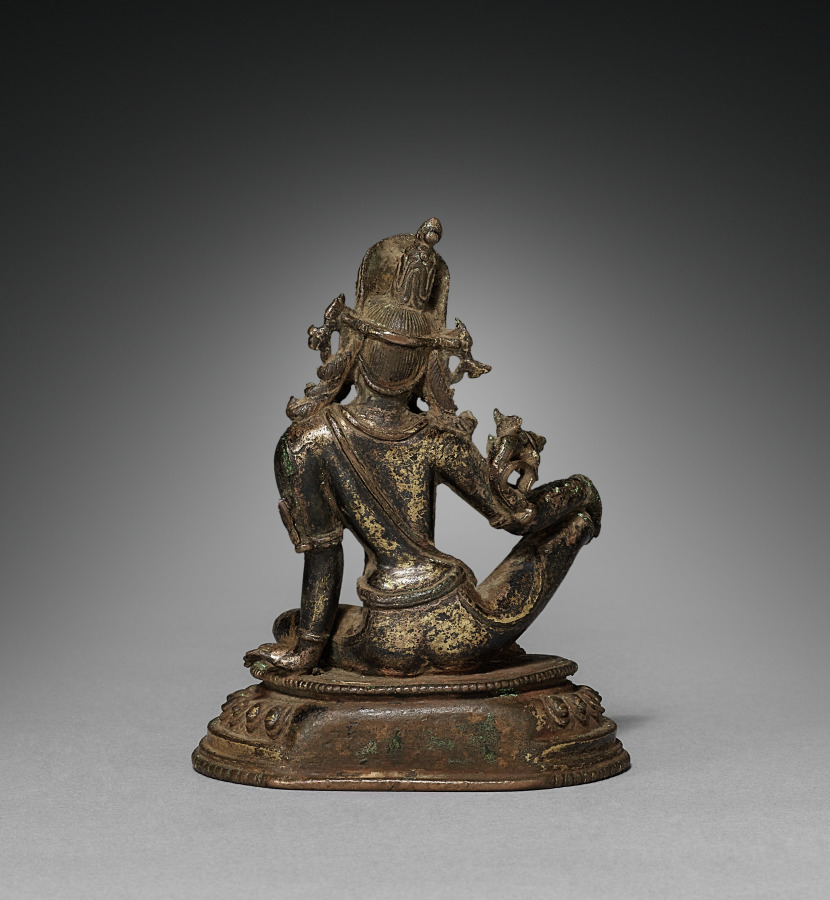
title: Avalokiteshvara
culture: Nepal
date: 1300s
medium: gilt bronze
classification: Sculpture